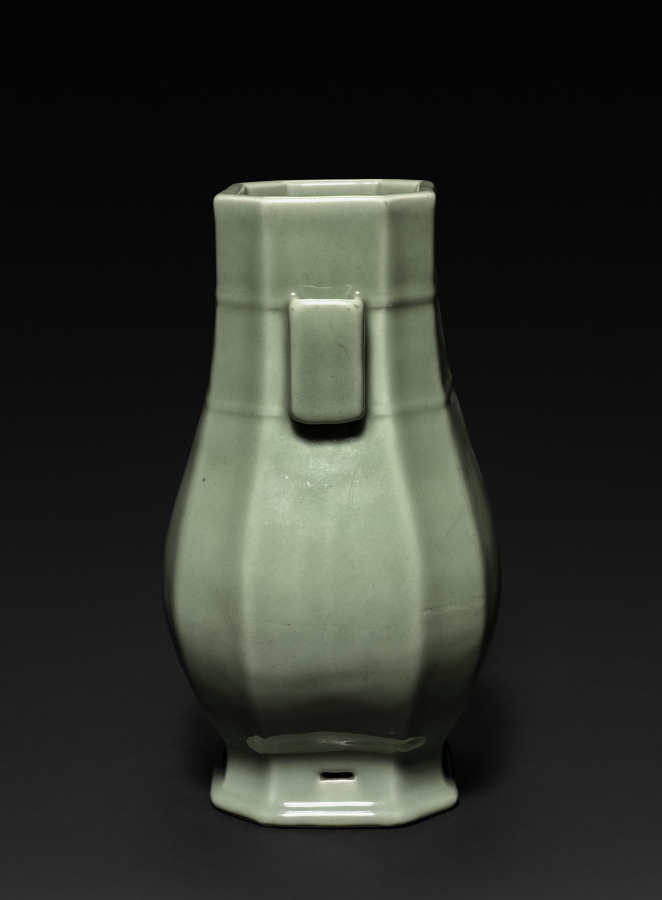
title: Suspension Vase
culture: China, Jiangxi Province, Jingdezhen kilns, Qing dynasty (1644–1911), Yongzheng mark and reign (1722–35)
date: 1723–35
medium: porcelain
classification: Ceramic